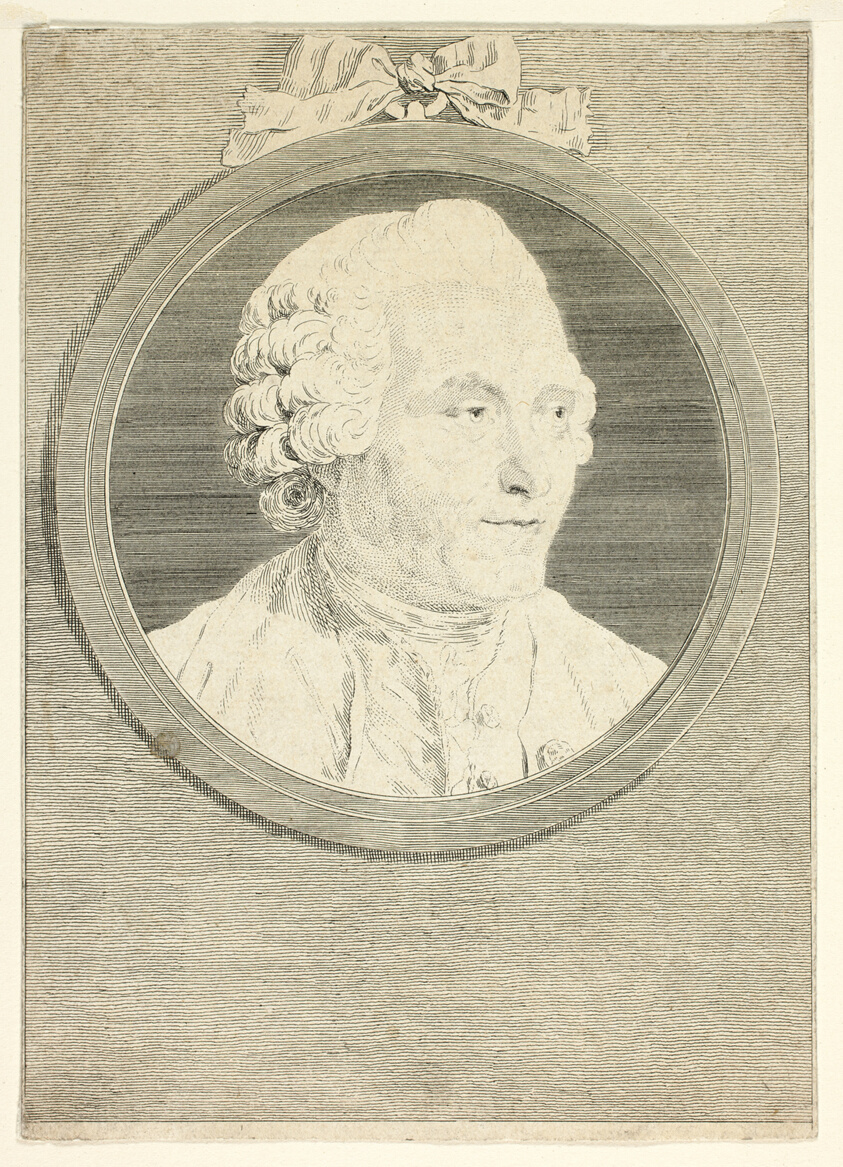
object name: Print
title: Portrait of Hubert Gravelot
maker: Jean Massard (French, 1740-1822); after Maurice Quentin de Latour (French, 1704-1788)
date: 1760/1822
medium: Etching in black, with roulette, on ivory laid paper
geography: France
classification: etching; print; prints and drawing